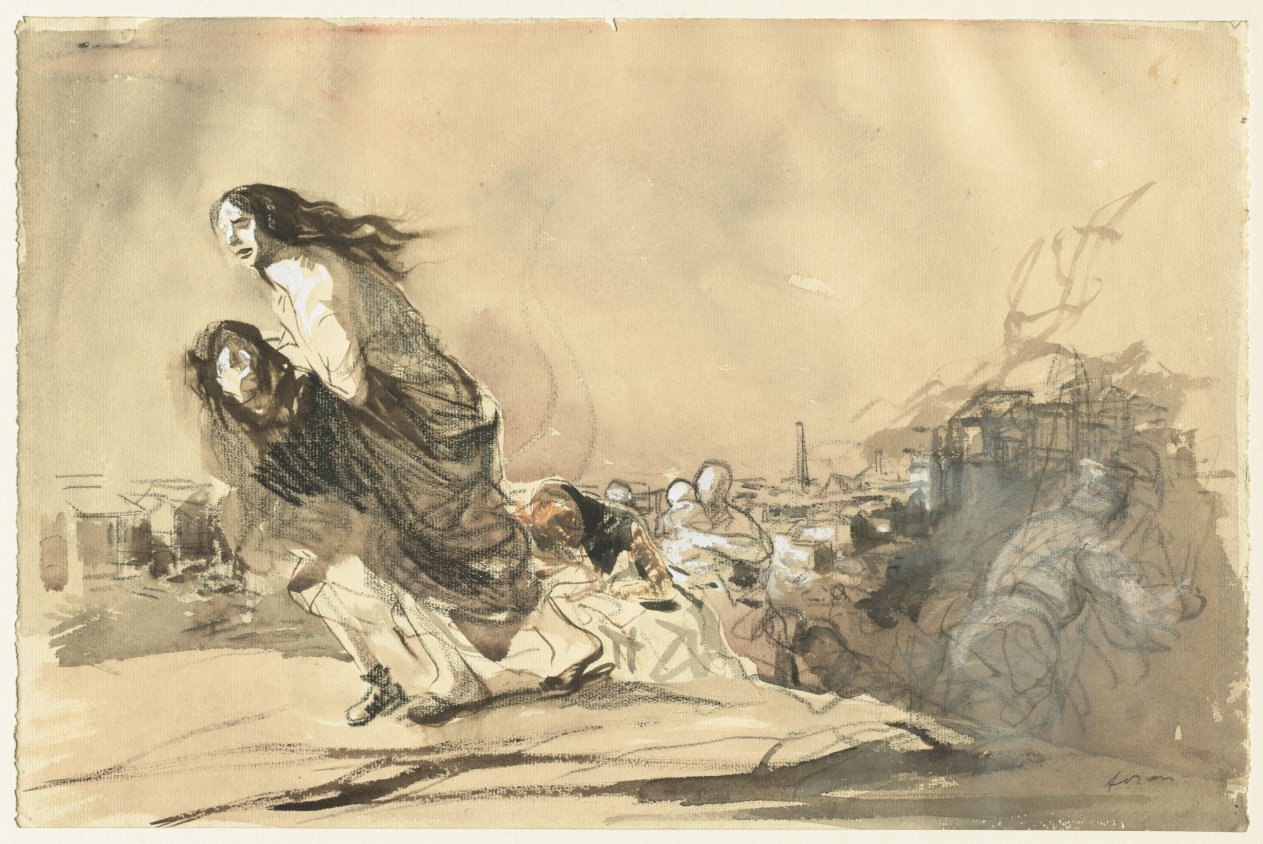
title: "The German troups received the formal order to spare private property"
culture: France, late 19th-early 20th Century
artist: Jean Louis Forain (French, 1852–1931)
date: fourth quarter 1800s or first third 1900s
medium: black crayon and brush and brown, gray and red wash, heightened with white gouache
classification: Drawing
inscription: signed, lower right, in graphite: forain ; VERSO, along lower edge, in graphite: Après Douai - "Les troupes allemandes ont reçu l'ordre le plus formel d'épargner la propriété privée." [Solf.?] " Sans doute, l'ordre n'était / pas encore arrivé." ; lower right, in graphite: A2185